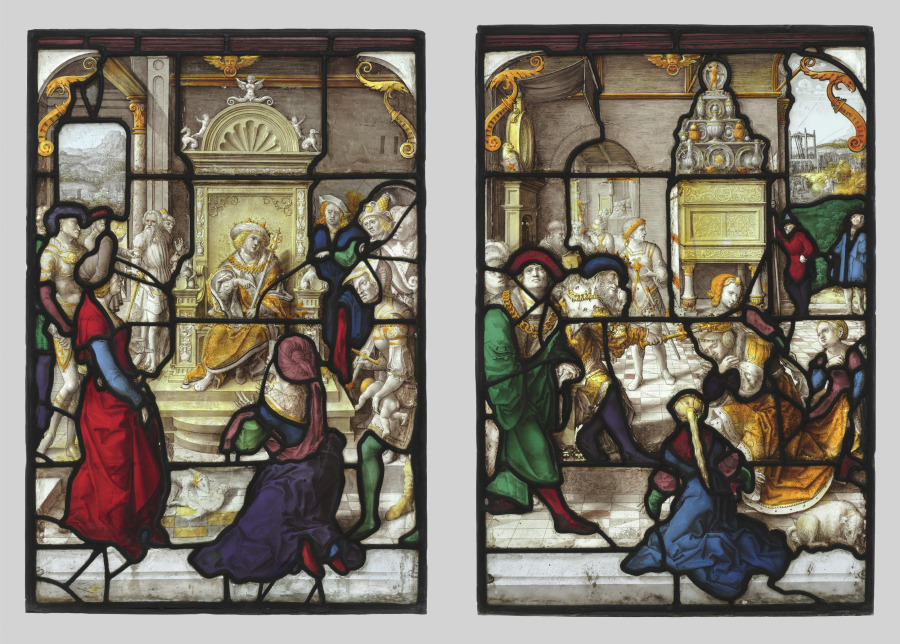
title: The Judgment of Solomon and Esther before Ahasuerus (pair)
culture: Netherlands, South Lowlands, 16th century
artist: Dirk Vellert (Netherlandish, 1480/85–1547)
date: c. 1530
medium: pot metal, white glass, and silver stain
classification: Glass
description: Though also a painter and printmaker, Dierick (or Dirk) Vellert is best known as a designer of stained glass. Active in Antwerp, where he became a master of the Guild of Saint Luke in 1511, Vellert richly ornamented his work with garlands, masks, vases, and other classically inspired motifs. A great deal of his glass was exported. As an engraver, his prints owe a good deal to Albrecht Dürer and Luca van Leyden. These two panels depict famous incidents from the Old Testament featuring the rendering of judgment. Both may have originally been made for a council chamber or a court of justice. Conceivably, because of their subjects, they could have served as models of justice for the magistrates who deliberated within view of them.